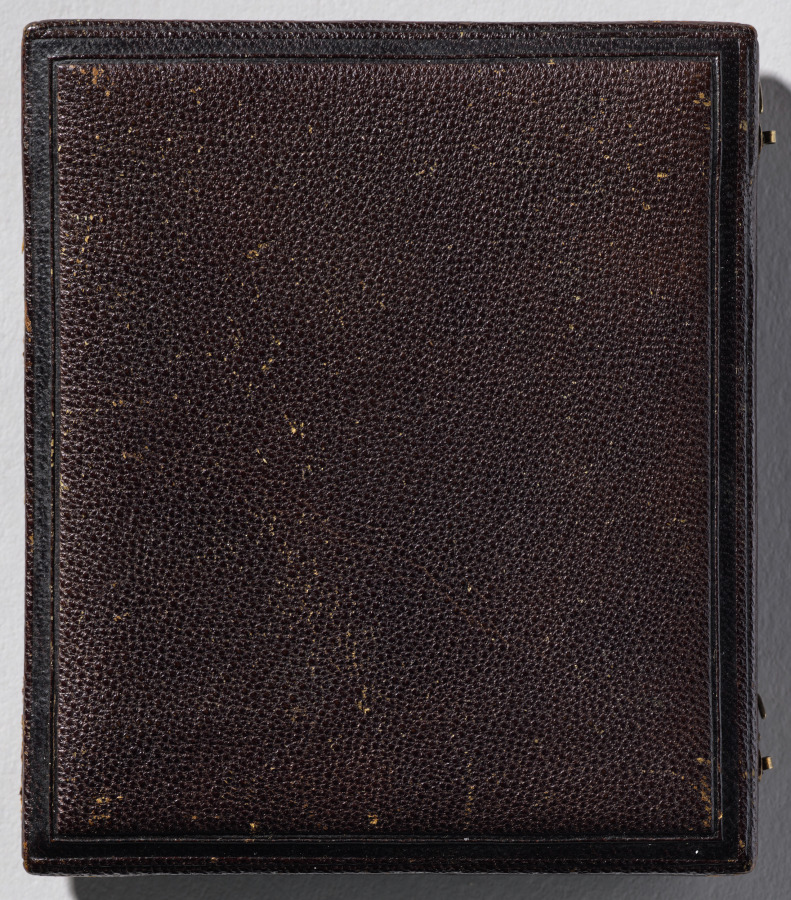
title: Alice Montgomery (1850-1917)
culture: America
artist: Enoch Long (American, 1823–1898)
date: 1850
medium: daguerreotype, applied color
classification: Photograph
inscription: Written in black ink on enclosed paper: "Alice Montgomery / 1850-1917"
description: Children have always been particularly cherished subjects for photography. Portraits were made to preserve the memory of their stages of growth and, in an age when long-distance travel was rare, to share with faraway relatives. And, for a sadder reason: in 1840 an estimated one-third of children died before age five. Photography offered grieving parents the opportunity to immortalize their children’s features. This tragic genre of photographs, later called “post-mortems,” often depicts the children in fine clothing, laying down with eyes shut, as if merely napping.